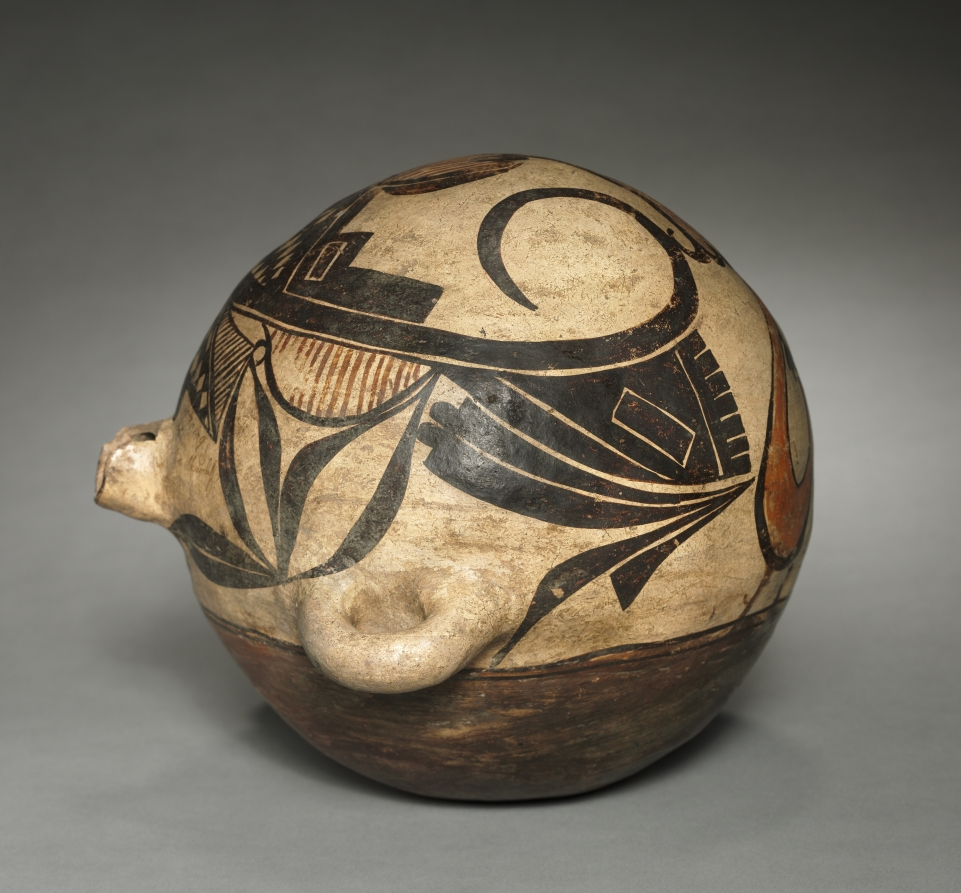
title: Canteen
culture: Native North America, Southwest, Arizona, Pueblo, Hopi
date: 1870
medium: ceramic, slip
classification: Ceramic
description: Since the 1500s, Hopi women made big-bellied canteens, based on Spanish prototypes, and used them to carry water. By the late 1800s, canteens became popular with Euro-American tourists, who increasingly flocked to the Southwest in search of encounters with “exotic” Native American cultures. Thus, Hopi artists embellished their wares to improve their appeal, here with graceful abstract forms.